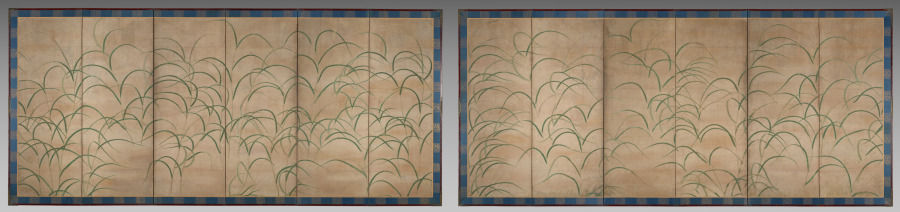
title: Susuki Grass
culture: Japan, Muromachi period (1392–1573)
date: c. 1525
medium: Pair of six-panel folding screens; ink, color, and gold on paper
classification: Painting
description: Susuki grass has a seasonal association with autumn in the Japanese visual and literary tradition. It is one of the “Seven Flowers of Autumn,” along with bush clover, arrowroot, pink, patrinia, mistflower, and bellflower. This composition immerses the beholder in a field of grasses and golden bands of mist. The design may have served as a backdrop for poems brushed in ink on decorated papers and attached to the surface of the screens, a practice with a long tradition in Japan.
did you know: The botanical name for susuki grass is miscanthus.